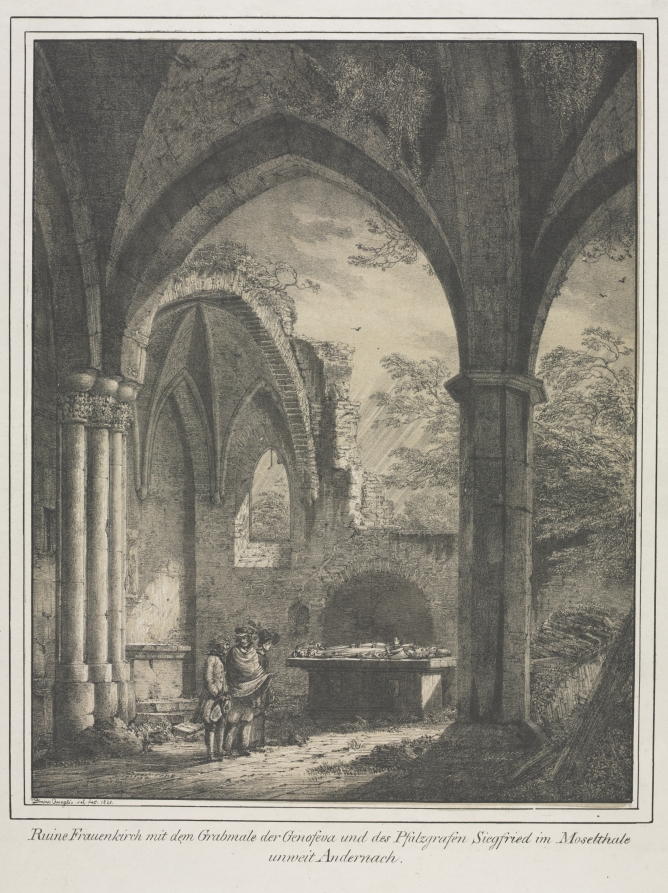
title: Notable Buildings of the Middle Ages in Germany: Ruins of the Church of the Virgin with the Tomb of Genevieve and Siegfried, Count Palatine of the Rhine, in the Moselle Valley near Andernack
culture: Germany, 19th century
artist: Domenico Quaglio (German, 1787–1837)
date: 1821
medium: lithograph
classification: Print